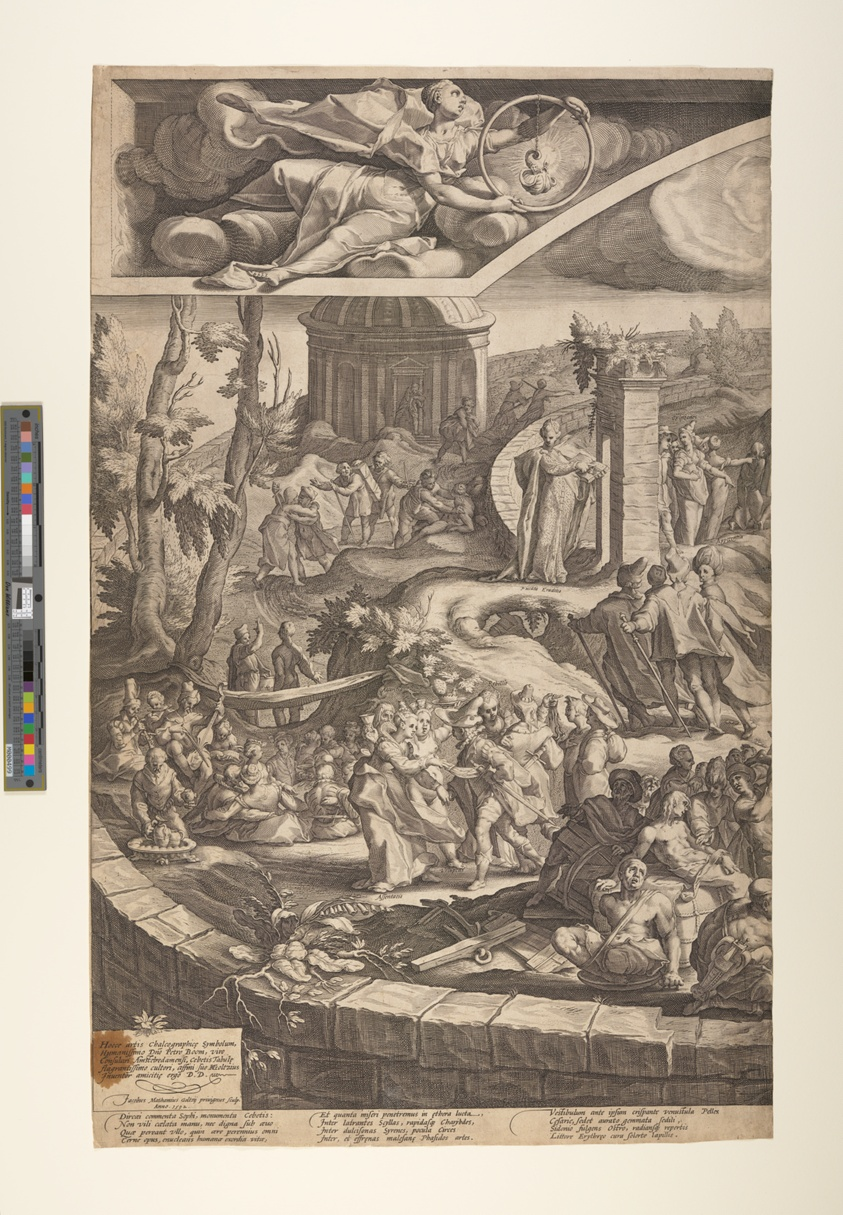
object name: Print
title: The Table of Cebes (plate 1)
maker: Jacob Matham (Dutch, 1571–1631); after Hendrick Goltzius (Dutch, 1558–1617)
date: 1592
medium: Engraving on ivory laid paper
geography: Netherlands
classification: engraving; paper; print; prints and drawing